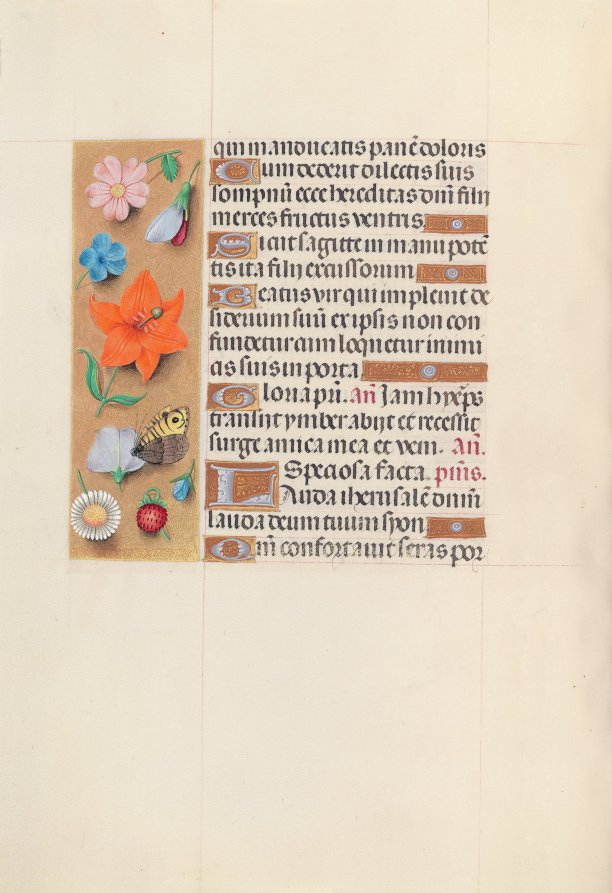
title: Hours of Queen Isabella the Catholic, Queen of Spain: Fol. 149v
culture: Flanders, Ghent and Bruges, late 15th century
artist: Master of the First Prayerbook of Maximillian (Flemish, c. 1444–1519)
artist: and Associates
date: c. 1500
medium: ink, tempera, and gold on vellum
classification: Bound Volume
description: This manuscript was illuminated by a circle of at least five highly organized manuscript painters active in the Flemish cities of Ghent and Bruges. The principal illuminator was Alexander Bening, who painted the majority of the book's miniatures. Manuscripts produced by this circle of artists are renowned for the decoration of their borders, which typically feature a rich variety of realistically-painted flowers, birds, and butterflies. This prayer book, called a book of hours, was intended not for a cleric, but for the private devotions of a lay person-in this case, Isabella the Catholic, Queen of Spain (1451-1504). Isabella's coat of arms embellishes the book's frontispiece. It is unlikely that the book was commissioned by the Queen herself; rather, she probably received it as a diplomatic gift from someone courting her patronage, perhaps Cardinal Francisco Jimenez de Cisneros. A Franciscan friar, Jimenez was dependent upon Isabella for his advancement, first to the post of Queen's confessor in 1492, and then to Archbishop of Toledo in 1495.